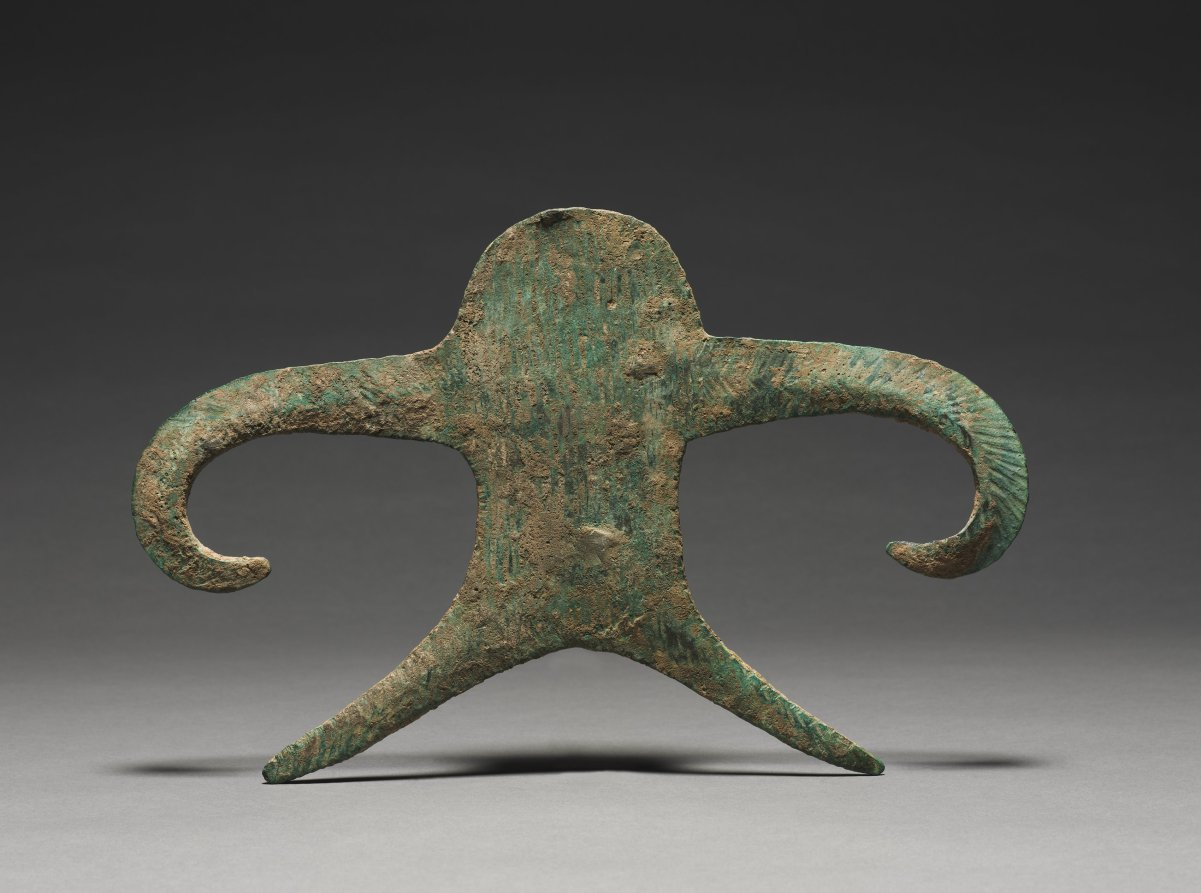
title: Anthropomorph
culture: India, Bronze Age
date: c. 1500–1000 BCE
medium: copper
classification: Sculpture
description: Among the few works of art known from the first millennium BC in India, anthropomorphs such as this fine example have an abstract formal appeal, but their meaning and function remain mysterious. They were made during the approximately 1,500-year long period of time between the protohistoric Indus Valley civilization, which flourished between about 2,800–1,800 BC, and the Maurya period (322–187 BC), when works of art must have been made in perishable materials that no longer survive.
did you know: Most of these mysterious objects were discovered in the plain regions of the Ganges and Yamuna Rivers of northern India.